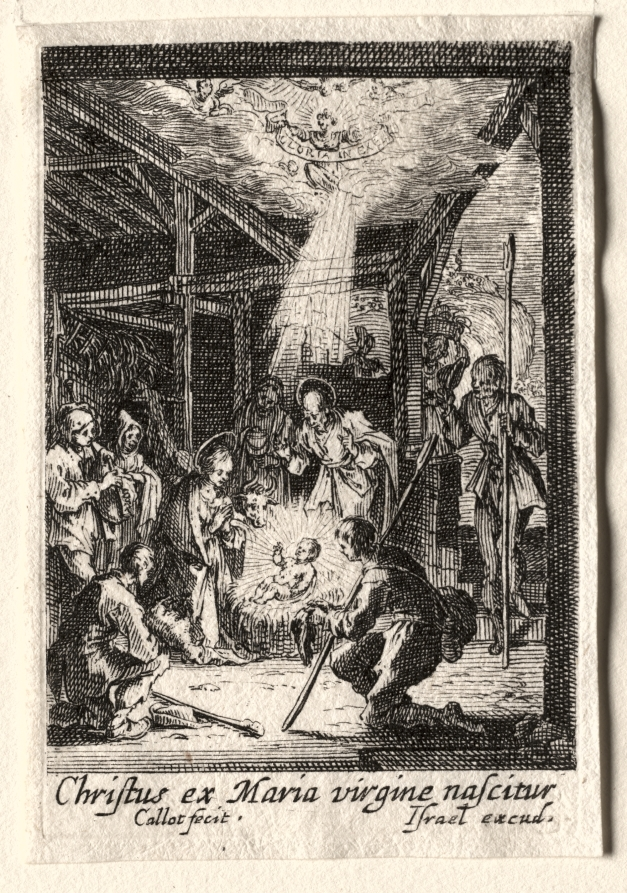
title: The Life of the Virgin: The Nativity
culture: France, 17th century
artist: Jacques Callot (French, 1592–1635)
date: ca. 1633–34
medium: etching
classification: Print